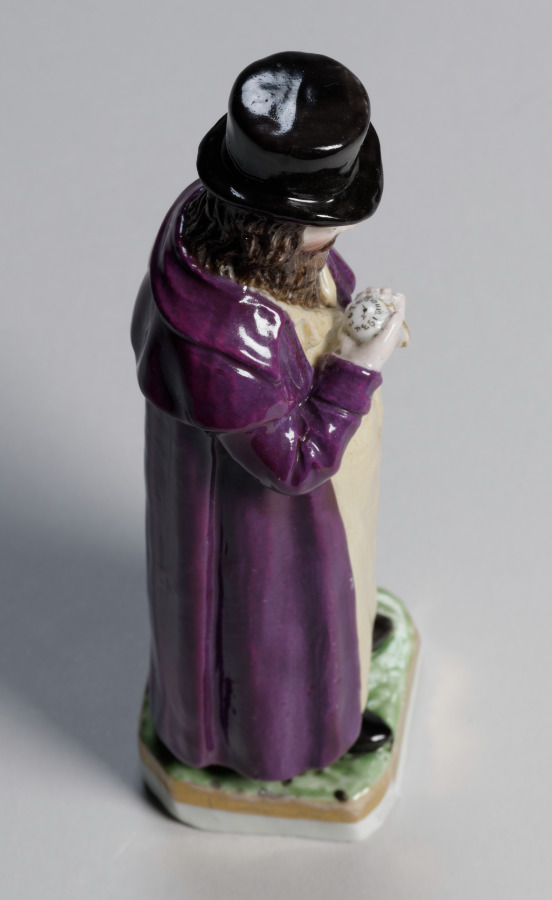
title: Man Holding a Watch (The Buyer)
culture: Russia, Moscow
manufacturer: Gardner Factory (Russian)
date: c. 1820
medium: porcelain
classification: Ceramic